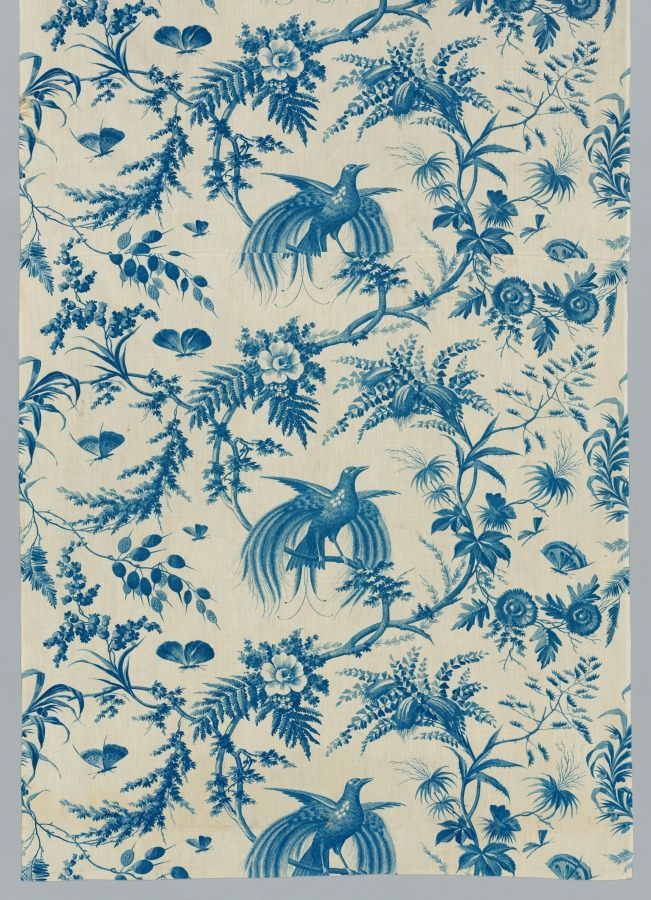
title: Strip of Copperplate Printed Cotton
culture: France, early 19th century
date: early 1800s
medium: copperplate printed cotton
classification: Textile